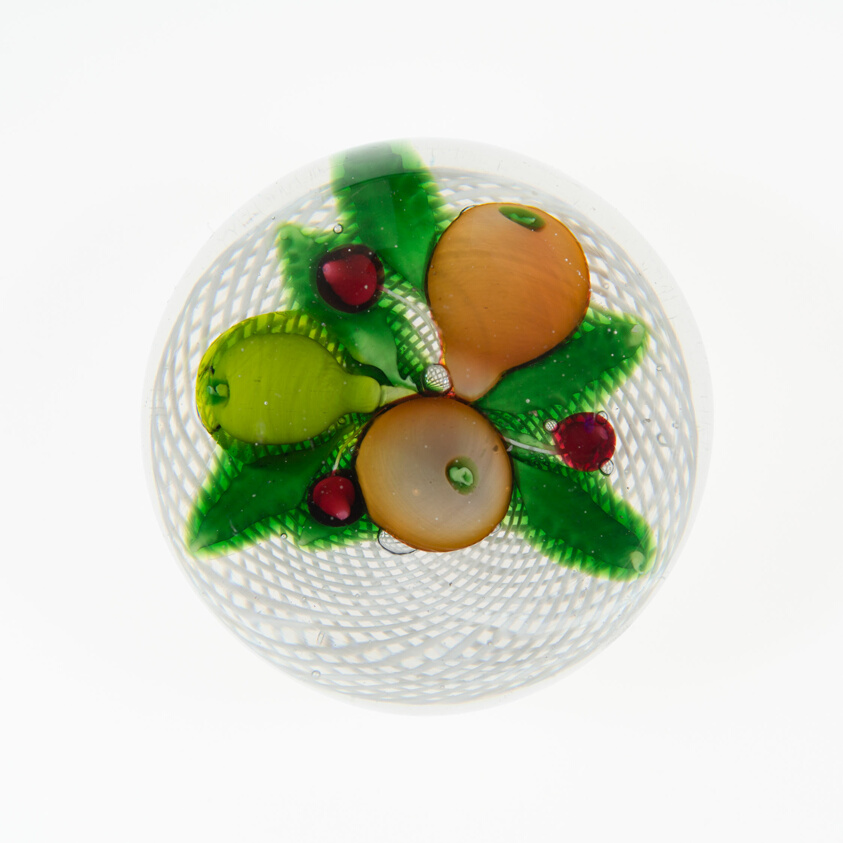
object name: Glass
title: Paperweight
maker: Saint-Louis Glassworks (Cristalleries de Saint-Louis); Lorraine, France, founded 1586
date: 19th century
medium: Glass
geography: Saint-Louis-lès-Bitche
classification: paperweight; lampwork; european decorative arts; glass